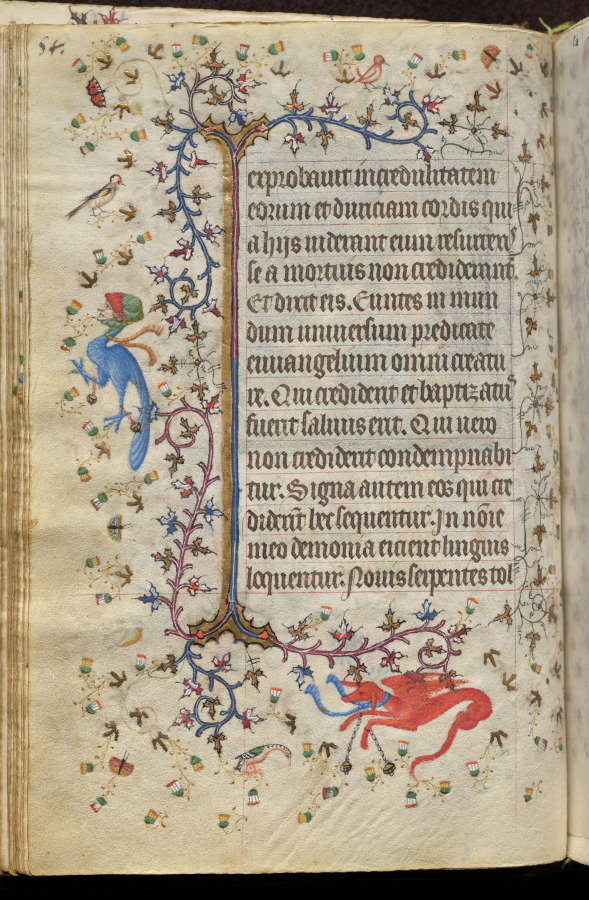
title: Hours of Charles the Noble, King of Navarre (1361-1425): fol. 27v, Text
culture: France, Paris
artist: Master of the Brussels Initials and Associates (French)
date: c. 1405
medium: ink, tempera, and gold on vellum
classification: Bound Volume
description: This precious volume was obviously highly prized by its owner, the French-born King of Navarre, who had his coat of arms painted on no less than twenty folios. Rather than directly commissioning this manuscript from a specific workshop, it seems that Charles the Noble acquired his book of hours -- perhaps ready-made for the luxury market -- while on a trip to Paris in 1404-05. A collaborative effort, six painting styles are evidenced within the pages of this codex, those of two Italians, two Frenchmen, and two Netherlanders. The painter who was responsible for the planning and decoration of the book, and who produced seventeen of the large miniatures, was a Bolognese artist known as the Master of the Brussels Initials. His principal assistant, responsible for most of the borders, was a Florentine who signed his name "Zecho" da Firenze on folio 208 verso.